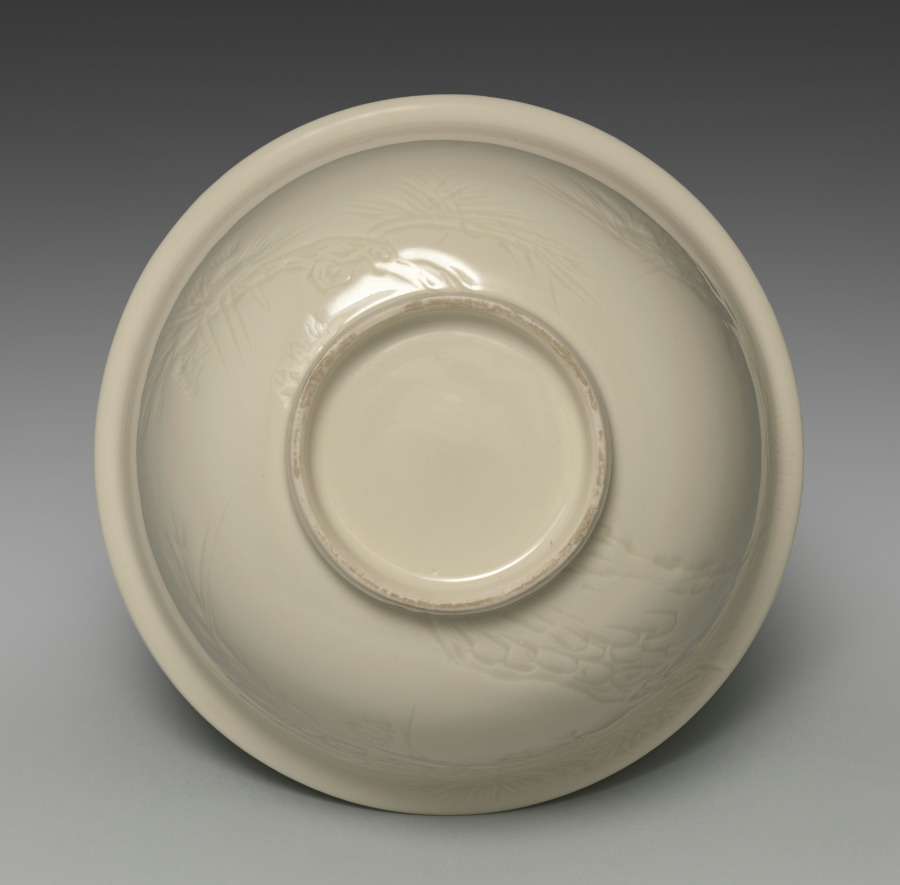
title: Bowl with Old Pine and Poem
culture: Japan, Taishō period (1912–26) or Shōwa period (1926–89)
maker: Seifū Yohei IV (Japanese, 1872–1951)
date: 1914–46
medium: Porcelain with molded and carved design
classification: Ceramic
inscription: 鶴樹君子風拂太平枝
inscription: 清風造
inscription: 清風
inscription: 成山清風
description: A grand, aged pine is carved into the body of this bowl. The inscription on the reverse side explains the tree’s presence. It is an altered version of two lines from a poem by Li Jiao (646?–715?) called “Pine.” Li Jiao was a senior government official who had a tumultuous career under the reign of Wu Zetian (r. 690–705), as well as those of her sons and grandson during the Tang dynasty (618–907). Although little known today, his work was read in Japan during the Heian (794–1185) and Kamakura periods (1185–1333). An anthology containing his poems, which was lost in China, was passed down across the generations in Japan. The translation of the inscription is as follows (the original characters, written and read from right to left, are shown below from left to right): The crane nests in the mastwood tree, the wind flicks at its peaceful branches. 鶴樹君子風拂太平枝 The mastwood is a pine-like evergreen, and the crane sheltering there is protected from the wind. In the original poem, the characters before “branches” (枝) are rather 大夫, meaning “high official.” This is likely a reference to the title bestowed upon a pine tree by the emperor Qin Shi Huang (r. 221–210 BCE) in thanks for its protection when a fierce rain fell as he ascended Mount Tai to pay his obeisance to the heavens.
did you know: The box inscription identifies the bowl's glaze as kanpakuyū, "bright-jewel white glaze."